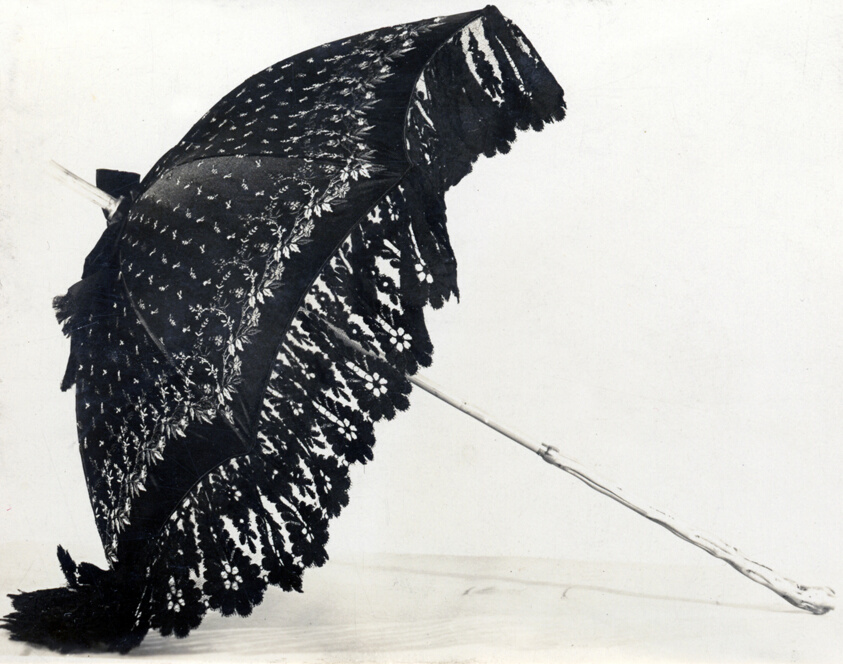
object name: Textile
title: Parasol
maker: France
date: c.1878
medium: Silk, satin weave; embroidered with silk floss in satin (flat) running black, outline, and star stitches; steel frame; knotted wood handle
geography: France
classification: textile; costume accessory - parasol; parasol - needlework